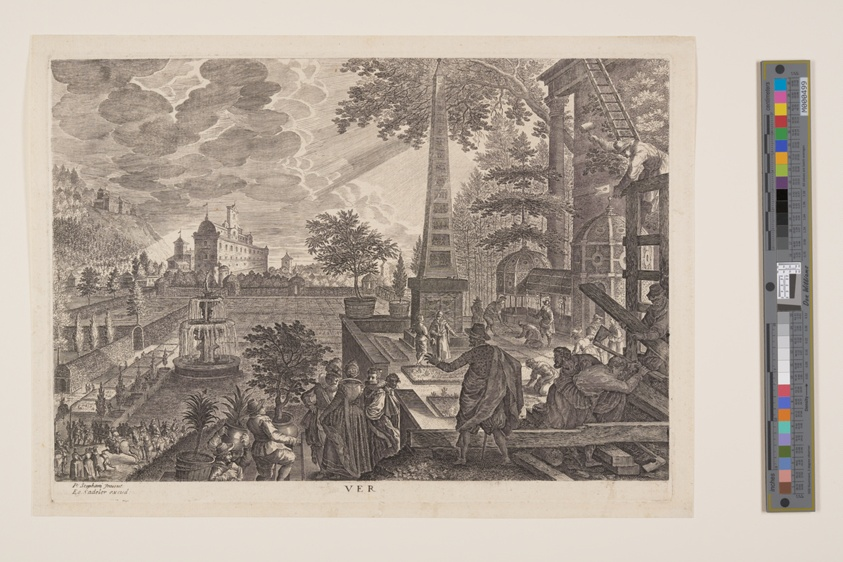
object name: Print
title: Spring, from The Four Seasons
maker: Aegidius Sadeler II (Flemish, c. 1570–1629); after Pieter Stevens (Flemish, 1567-after 1624)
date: 1620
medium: Engraving on ivory laid paper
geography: Flanders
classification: print; paper; prints and drawing; engraving